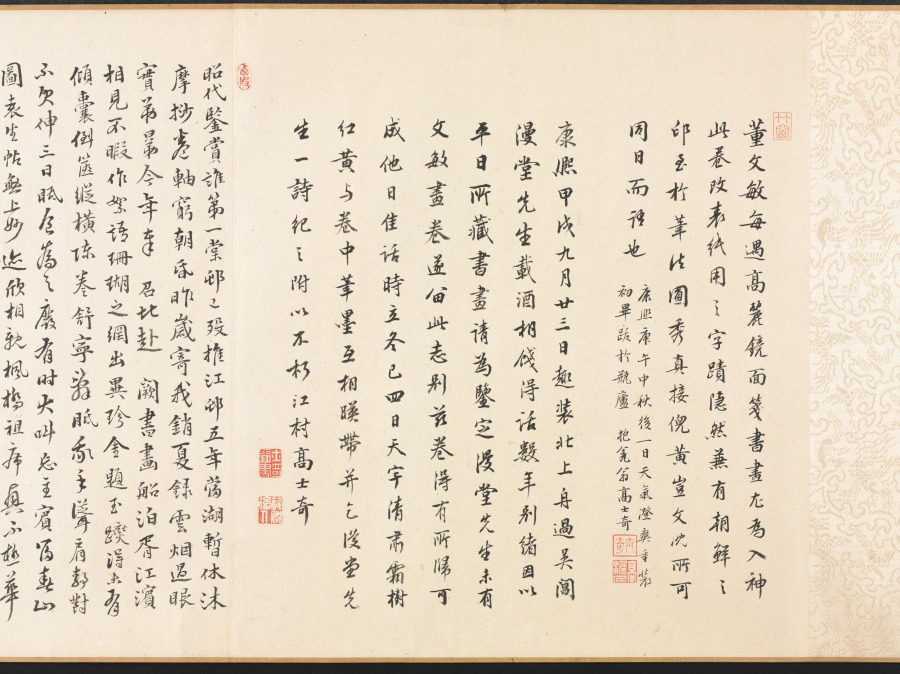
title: River and Mountains on a Clear Autumn Day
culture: China, Ming dynasty (1368–1644)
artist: Dong Qichang (Chinese, 1555–1636)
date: c. 1624–27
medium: Handscroll; ink on Korean paper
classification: Painting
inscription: 黃子久江山秋霽似此，當恨古人不見我也。思翁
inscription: 董文敏每遇高麗鏡面箋，書畫尤為入神。此卷改表紙用之，字跡隱然，兼有朝鮮之印。至於筆法圓秀，真接倪黃。豈文沈所可同日而語也。 康熙庚午中秋後一日，天氣澄爽，重裝初畢，跋於瓶廬。抱瓮翁高士奇。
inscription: Second inscription by Gao Shiqi 高士奇 (1645–1704): On the twenty-third day of the ninth month, the jiaxu year of the Kangxi era [1694], I packed my bags to head north. When my boat passed Wuchang [Suzhou], Mr. Mantang [Song Luo] brought wine to bid me farewell so that we could share our thoughts on our separation in the last few years. I showed him the paintings and calligraphy which I collected and asked his opinions. Since Mr. Mantang does not own any handscrolls by Wenmin [Dong Qichang], I leave this one for him in commemoration of our parting; thus the painting will have a worthy owner and our meeting will become a beautiful story in the future. It is the fourth day after the beginning of winter, with the sky clear and sober. Trees under frost have turned red and yellow, seemingly echoing the brush and ink in the painting. I also ask Mr. Mantang to inscribe a poem to commemorate our meeting so that it will survive forever.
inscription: 1 colophon and 4 seals of Song Luo 宋犖 (1634–1713): Who is the foremost art connoisseur of our dynasty?/ Tangcun [Liang Qingbiao, 1620–1691] is dead, so the title passes to Jiangcun [Gao Shiqi]./ Leaving office, you retired for five years in the Lake region./ Fondling handscrolls and hanging scrolls from morning to evening./ You sent me your collection catalogue Xiao Xia Lu last year;/ It is indeed the true equal of [Zhou Mi's] Yun Yan Guo Yan./ This year you returned to the capital by imperial order;/ Your boat with calligraphy and paintings anchored at the river bank in Suzhou./ When we met each other you did not waste any time for conversation by poured out immediately/ From your "coral net" extraordinary treasures./ You produced incomparable scrolls, with gold-inscribed labels and jade rollers,/ Pouring out from bags and trunks, they were spread in disarray./ Without a word, I rolled and unrolled until my fingers were numbed,/ We sat straight, facing each other quietly, and never felt tired./ For three days we forgot about sleeping and food./ And at times we shouted our joy out loud, forgetting who is host or guest./ Your Dwelling in the Fuchun Mountains and the Yuansheng manuscript/ These peerless works I myself examined with delight./ As an added pleasure to the farewell dinner under the Maple Bridge,/ You allowed me to hold again this handscroll by Dong Qichang--/ The Misty River and Piled Peaks [by Zhao Mengfu] and this Clear Autumn Day are two extraordinary masterpieces./ In showing such life and spirit with "qi yun." the artists were truly "men of heaven."/ The Clear Autumn Day is not even three feet long,/ Painted on tributary Korean paper, it shines like silver./ Every building up and every turn of the mountains imitates nature,/ Every tree and every rock is removed from the commonplace./ From the beginning, the theory of poetry is the theory of painting,/ Like the lotus and the morning sunshine, they complement and refresh each other./ The artist's inscription regrets that "the Old Masters cannot see my scroll."/ Huang Gongwang would have agreed in his grave./ The vermilion of the seals glitter and dazzles the eyes,/ These added accessories are as valuable as jade./ You are very kind to give it to me,/ The feelings expressed in your inscription are so sincere./ Wanting to refuse, but unable, I accept it to respect your wish,/ And taking off my gown and cap I wrapped it with care./ You asked me to write a long poem in commemoration of this beautiful occasion,/ I am too ashamed that my effort in response is so poor and inadequate./ Returning home, I unrolled it under candlelight, trying to write the colophon,/ The light of the waning moon shines at the foot of the mossy wall./ Earnestly humming and brows knit in deep thought, I try to compose;/ The verses are not outstanding, but the facts are real./ With this poem recorded at the end of the scroll, I mail it to you for approval,/ This poem and this painting shall outlast a thousand springs. (Translation by LYSL/HK/WKH)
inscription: 1 colophon and 2 seals of Shao Changheng 邵長蘅 (1637–1704); 2 inscriptions and 14 seals of the Qianlong 乾隆 emperor (r. 1736–95); 1 seal of the Jiaqing 嘉慶 emperor (r. 1796–1820); 3 seals of the Xuantong 宣統 emperor (r. 1908–11); 1 seal unidentified.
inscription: [印] 朝鮮國王之印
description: Dong Qichang had a tremendous impact on the artistic practices and historiography of later generations; his works and writings shaped literati aesthetics. Here, Dong places an abstract landscape composition diagonally across the picture plane, configured to recall earlier masters and simultaneously express his own personal style. Dong’s inscription claims, Huang Gongwang’s Autumn Day, looks like this. I truly regret the master has not seen my work. In fact, Dong Qichang may have had Dong Yuan’s Xiao and Xiang Rivers in mind, a work he owned and considered a key work in Chinese art history.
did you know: The painting has an imprint of a Korean seal that reads "Seal of the king of Joseon."